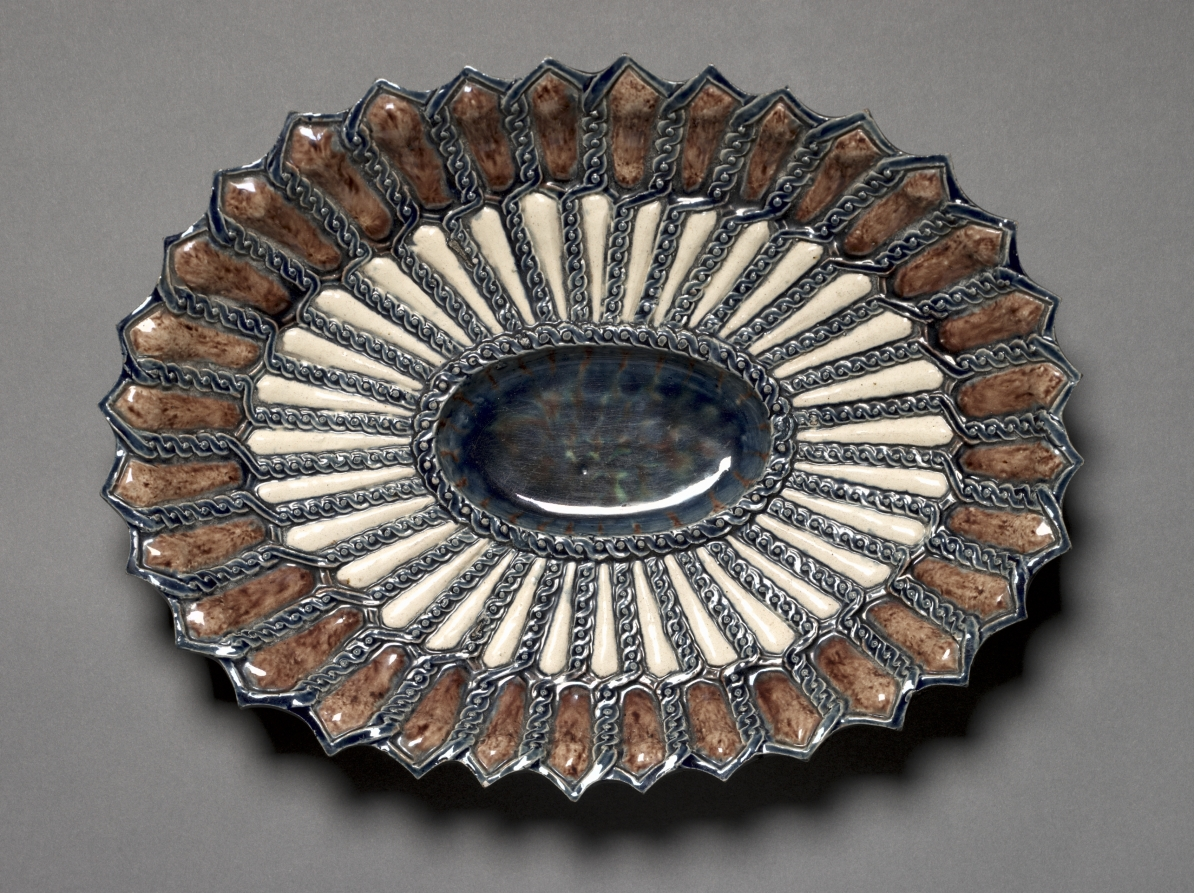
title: Oval Dish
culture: France, 16th century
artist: circle of Bernard Palissy (French, 1510–1589)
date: late 1500s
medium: lead-glazed earthenware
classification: Ceramic